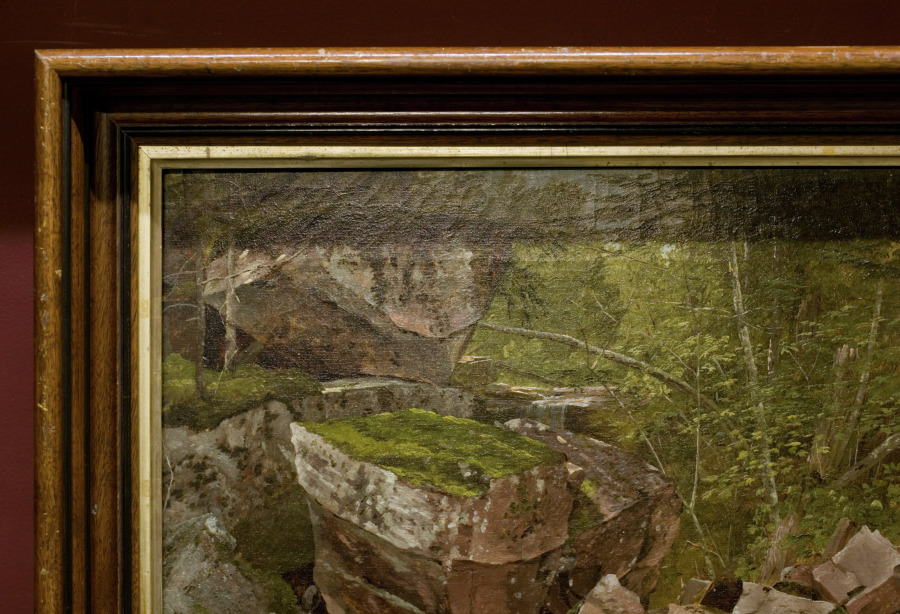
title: Study, North Conway, New Hampshire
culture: America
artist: David Johnson (American, 1827–1908)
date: 1851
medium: oil on canvas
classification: Painting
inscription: Signed lower right: "D. Johnson. / 1851"; inscribed lower left: "D.J. 1851. (false); signed on the back: "Study. North Conway. N.H. / David Johnson 1851]"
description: Johnson’s devotion to carefully observing nature is evident in his detailed rendering of a riverbed. Located in a village that provided a popular jumping-off point for tourists visiting the White Mountains, this untamed site features a haphazard arrangement of angled boulders, slippery moss, splintered tree branches, and dense undergrowth. Contemporary travel guidebooks often cautioned against the physical challenges—and the potential for injury—encountered by venturing into such inner recesses of the woods; one warned that “wild forest-clambering” could be akin to “fighting a phalanx of porcupines.”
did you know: North Conway, New Hampshire, markets itself as the birthplace of American skiing.